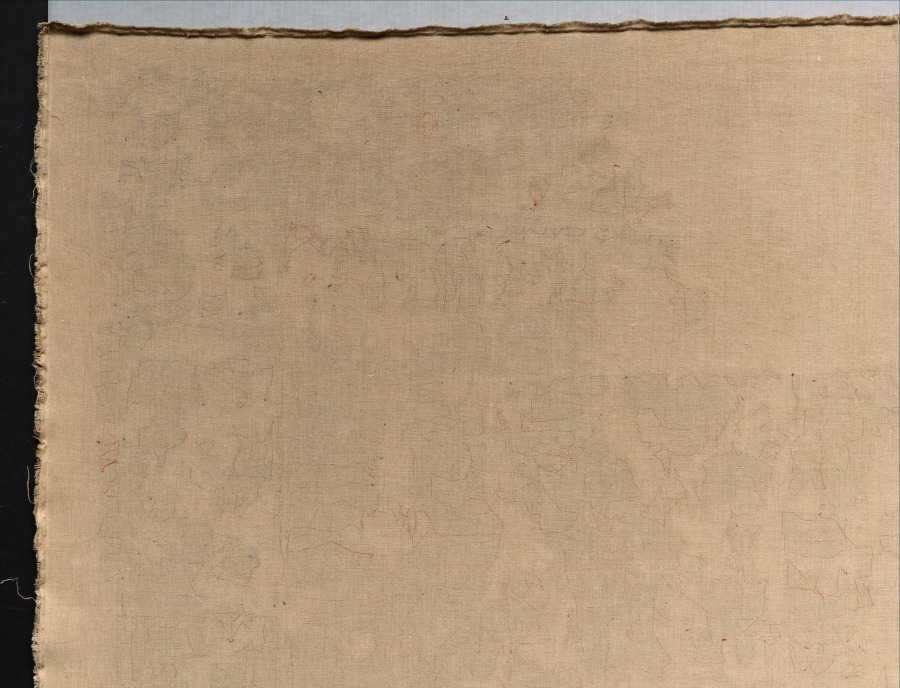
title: Fragment of a Large Hanging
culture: Egypt, Antinoë, Byzantine period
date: 500s CE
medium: tapestry weave (with plain tabby borders): wool and linen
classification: Textile